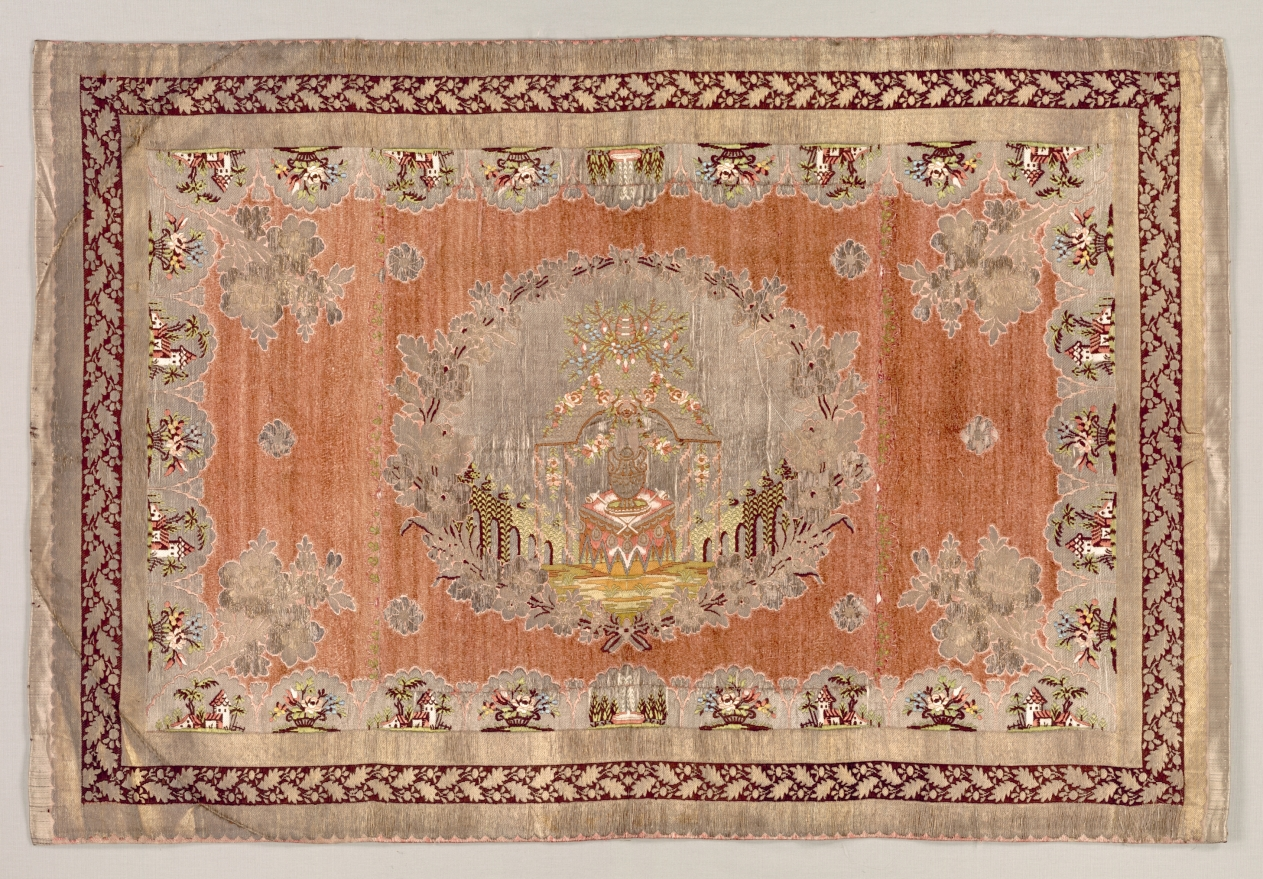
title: Embroidered Table Cover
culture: Turkey, Hereke, early 19th century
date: early 19th century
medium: brocade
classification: Textile